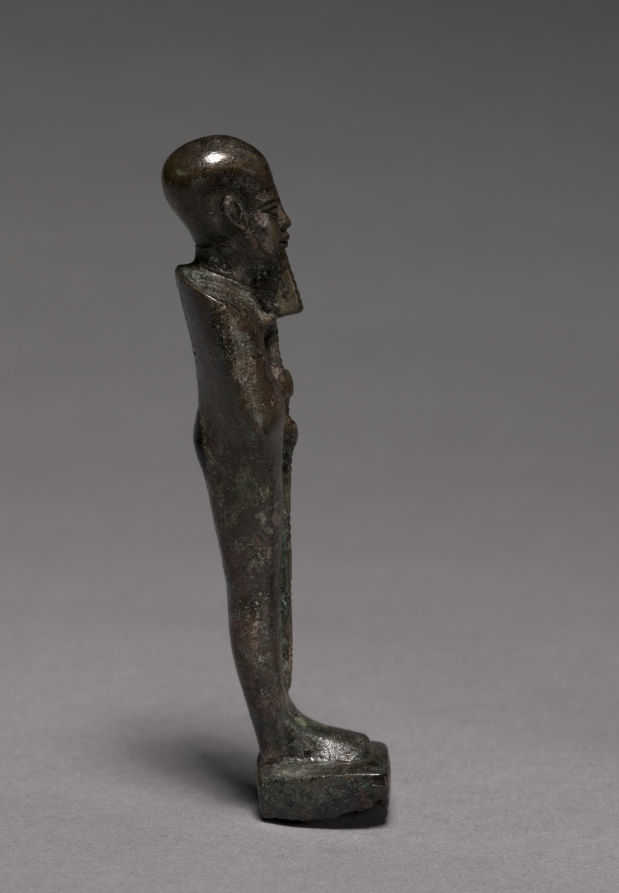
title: Statuette of Ptah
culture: Egypt, Late period (715–332 BCE), Dynasty 26 or later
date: 664–525 BCE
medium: bronze, solid cast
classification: Sculpture